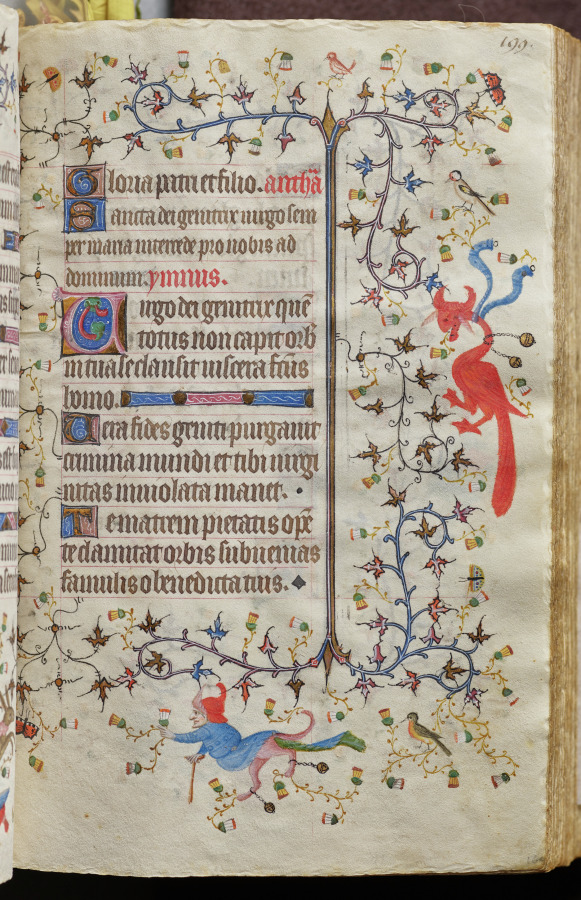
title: Hours of Charles the Noble, King of Navarre (1361-1425): fol. 100r, Text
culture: France, Paris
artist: Master of the Brussels Initials and Associates (French)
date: c. 1405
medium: ink, tempera, and gold on vellum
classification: Bound Volume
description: This precious volume was obviously highly prized by its owner, the French-born King of Navarre, who had his coat of arms painted on no less than twenty folios. Rather than directly commissioning this manuscript from a specific workshop, it seems that Charles the Noble acquired his book of hours -- perhaps ready-made for the luxury market -- while on a trip to Paris in 1404-05. A collaborative effort, six painting styles are evidenced within the pages of this codex, those of two Italians, two Frenchmen, and two Netherlanders. The painter who was responsible for the planning and decoration of the book, and who produced seventeen of the large miniatures, was a Bolognese artist known as the Master of the Brussels Initials. His principal assistant, responsible for most of the borders, was a Florentine who signed his name "Zecho" da Firenze on folio 208 verso.